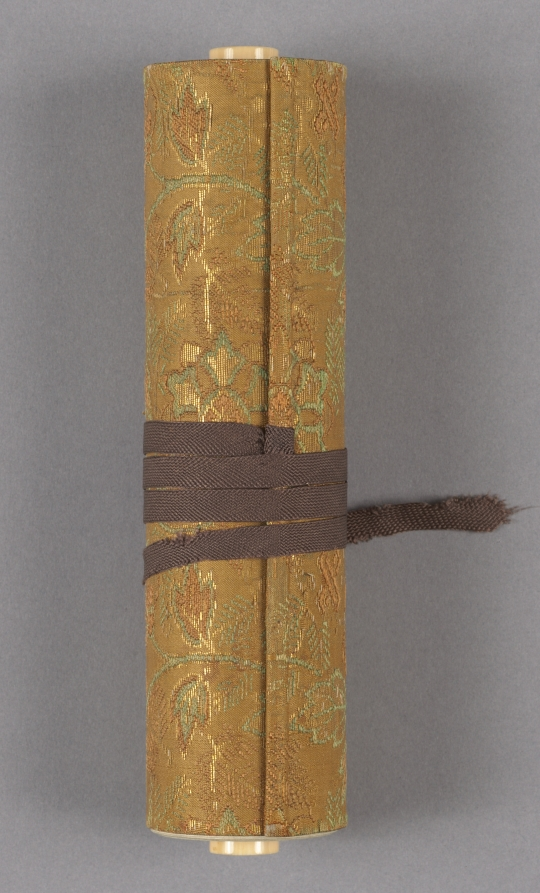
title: Eight Views of Xiao-Xiang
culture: Japan, Muromachi period (1392–1573)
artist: Sesson Shūkei (Japanese, c. 1492–c. 1577)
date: 1500s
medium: handscroll; ink on paper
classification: Painting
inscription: Signature and seal of artist at end of painting.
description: Eight Views of the Xiao and Xiang Rivers can be traced to 11th-century Chinese poems and paintings, the depiction of which had also become popular among Korean and Japanese painters. Xiao-Xiang refers to the region in present-day Hunan province where the Xiao and Xiang rivers converge. Few painters of the Eight Views had in fact seen the scenery; rather, they were trying to portray in ink and wash the lyrical qualities of dim light and a misty atmosphere typical of that region. Each of the poetic titles suggests a time of day, a season, or specific atmospheric conditions—subjects that challenged the abilities of the most talented artists. In this miniature painting (shukuzu) of the Muromachi period, Japanese Zen monk and painter Shukei Sesson depicted all eight views featured in Chinese prototypes: Wild Geese Descending to Sandbar; Returning Sails Off a Distant Coast; Mountain Market in Clearing Mist; River and Sky in Evening Snow; Autumn Moon over Dongting Lake; Night Rain on the Xiao and Xiang; Evening Bell from Mist-Shrouded Temple; and Fishing Village in Evening Glow.